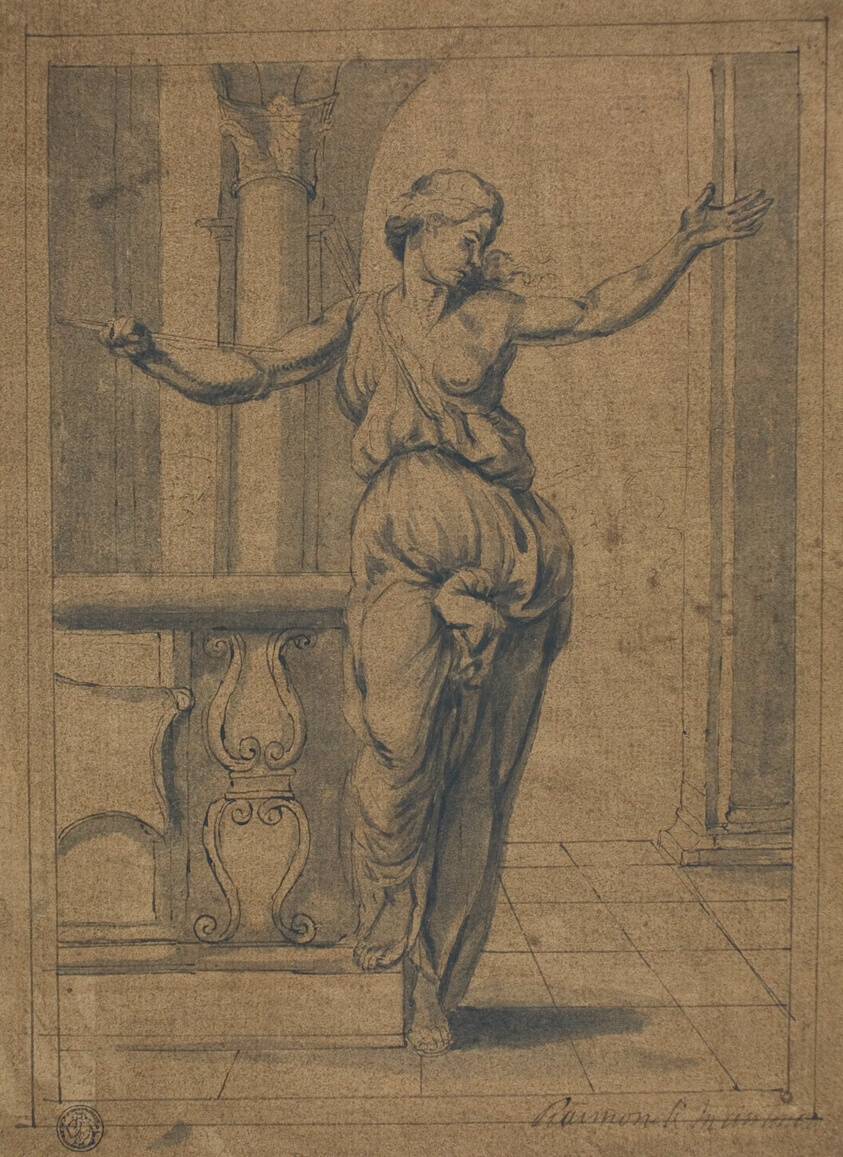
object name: Drawing and Watercolor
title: Lucretia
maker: After Raffaello Sanzio, called Raphael; Italian, 1483-1520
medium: Pen and black ink, with brush and gray wash, on on brown prepared laid paper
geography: Italy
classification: ink with wash; drawings (visual works); prints and drawing